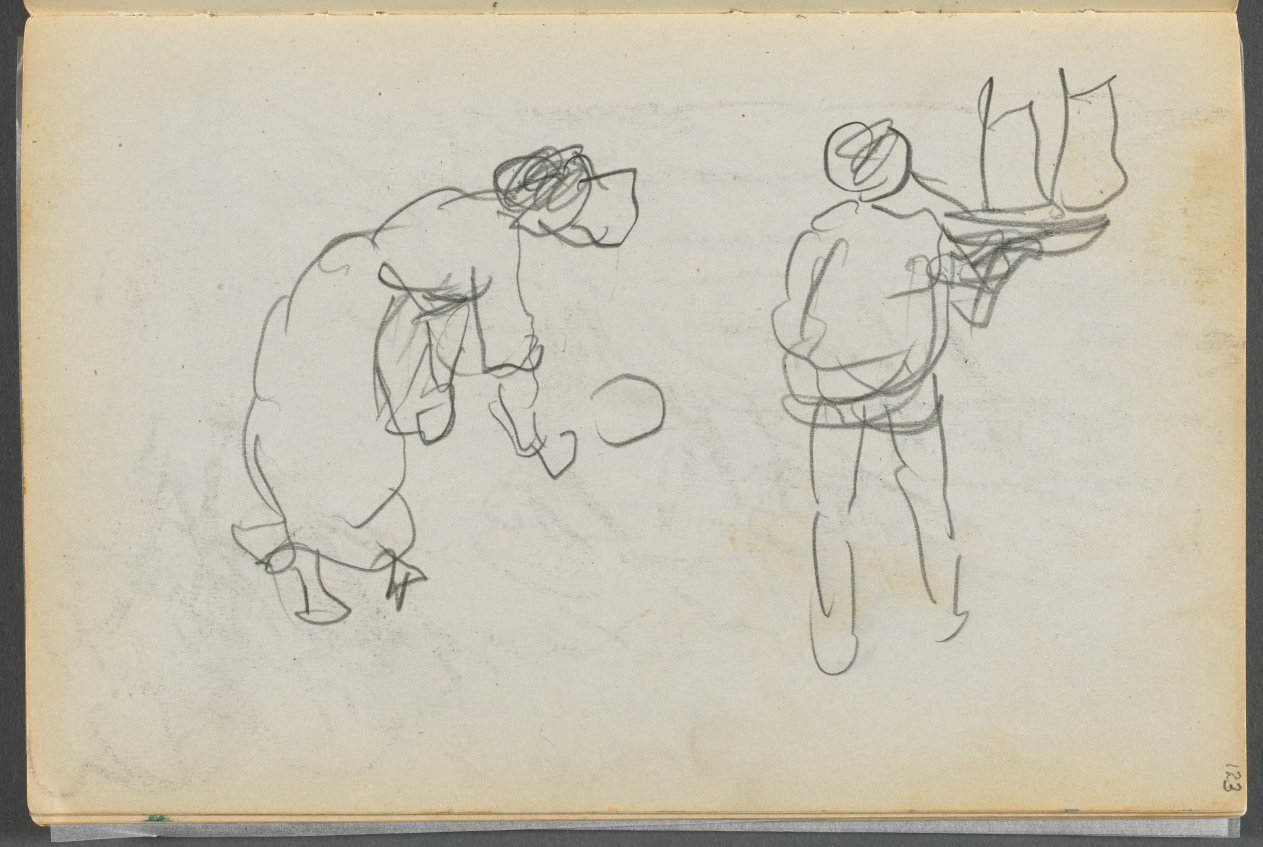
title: Sketchbook- The Granite Shore Hotel, Rockport, page 123: Two Figures with Sailboat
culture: America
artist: Maurice Prendergast (American, born Newfoundland [now Canada], 1858–1924)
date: 1905–10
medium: graphite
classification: Bound Volume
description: This sketchbook contains 72 pages of pencil drawings and 9 watercolors of Cape Ann. On the inside of the cover Prendergast wrote the address of the Granite Shore Hotel in Rockport, Massachusetts.